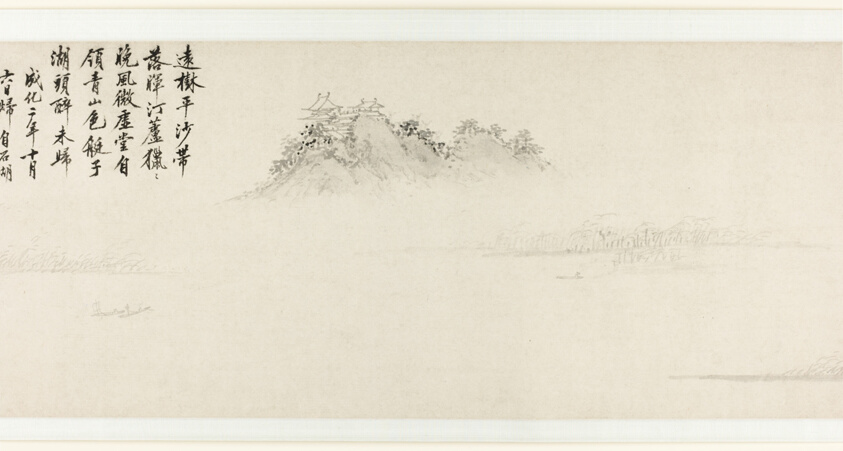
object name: Painting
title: Return to Stone Lake 石湖歸棹圖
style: Chinese (culture or style)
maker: Shen Zhou, 沈周; Chinese, 1427-1509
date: Ming dynasty (1368–1644), dated 1466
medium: Handscroll; ink on paper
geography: China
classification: handscroll; painting; asian art